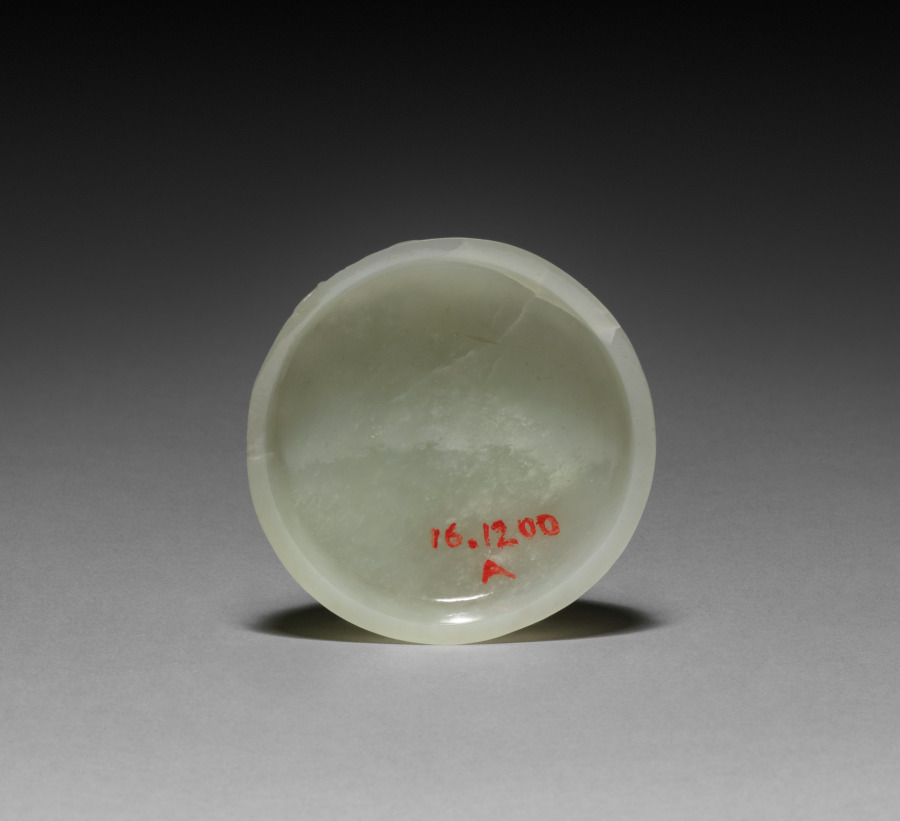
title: Box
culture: China, Qing dynasty (1644-1911)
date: 1644–1911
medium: jade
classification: Jade